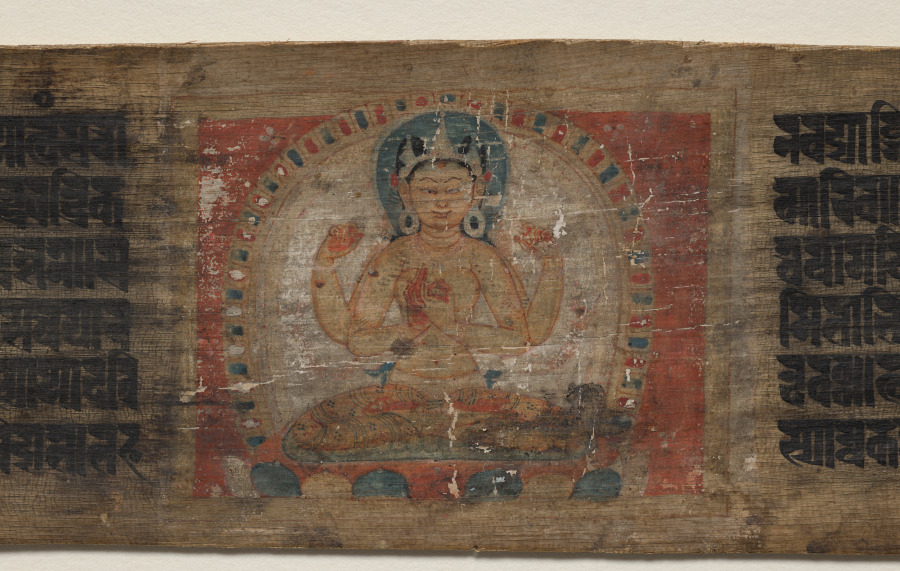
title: Prajnaparamita ﬂanked by two female ﬁgures, folio 1 (verso), from a Manuscript of the Perfection of Wisdom in Eight Thousand Lines (Ashtasahasrika Prajnaparamita-sutra)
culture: Eastern India, Bihar, Vikramashila Monastery. Painting: Nepal, Kathmandu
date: Sunday, September 14, 1119 (year 239 of the Newar Samvat in the month of Ashvina)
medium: Gum tempera and ink on palm leaf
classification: Painting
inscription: Om namo bhagavatya ārya Prajñāpāramitāyai // nirvikalpe namas tubhyaṃ prajñāpāramite 'mite yā tvaṃ sarvānavadyāṅgi niravadyair nirīkṣyase // ākāśam iva nirlepāṃ niṣprapañcāṃ nirakṣarām yas tvāṃ paśyati bhāvena sa paśyati tathāgatam // tava cārye guṇāḍhyāyā buddhasya ca jagadguroḥ na paśyanty antaraṃ santaś candracandrikayor iva // kṛpātmakāḥ prapadya tvāṃ buddhadharmapuraḥsarīm sukhenāyānti māhātmyam atulaṃ bhaktivatsale // sakṛd apy āśaye śuddhe yas tvāṃ vidhivad īkṣate tenāpi niyataṃ siddhiḥ prāpyate 'moghadarśane // sarveṣām api vīrāṇāṃ parārthaniratātmanām poṣikā janayitrī ca mātā tvam asi vatsalā // yad buddhā lokaguravaḥ putrās tava kṛpālavaḥ tena tvam api kalyāṇi sarvasattvapitāmahī // sarvapāramitābhis tvaṃ nirmalābhir anindite candralekheva tārābhir anuyātāsi sarvadā // vineyaṃ janam āsādya tatra tatra tathāgataiḥ bahurūpā tvam evaikā nānānāmabhir īḍyase // prabhāṃ prāpyeva dīptāṃśor avaśyāyodabindavaḥ tvāṃ prāpya pralayaṃ yānti doṣā vādāś ca vādinām // tvam eva trāsajananī bālānāṃ bhīmadarśanā āśvāsajananī cāsi viduṣāṃ saumyadarśanā // yasya tvayy apy abhiṣvaṅgas tvannāthasya na vidyate tasyāmba katham anyatra rāgadveṣau bhaviṣyataḥ // nāgacchasi kutaś cit tvaṃ na ca kva cana gacchasi sthāneṣv api ca [sarveṣu vidvadbhir nopalabhyase //]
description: In the center of the first folio, the personification of the texts found within the manuscript is shown as a crowned four-armed goddess holding a rosary, palm leaf, and giving a mudra, or symbolic hand gesture, indicating that she is in the process of teaching. The haloed Prajnaparamita’s golden skin tone and accoutrements showcase the image’s self-reflexive relationship to the light-colored palm leaf that was used to make this book. The text on this leaf is not the Perfection of Wisdom itself, but rather a preamble of praises to the goddess known as the Prajnaparamita-stotra of Rahula. These hymns would have continued onto folio 2 of the manuscript, which was unfortunately lost before the volume was acquired by the Cleveland Museum of Art.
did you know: Although barely visible now, delicate diaphanous scarves are draped around the arms of all three figures.